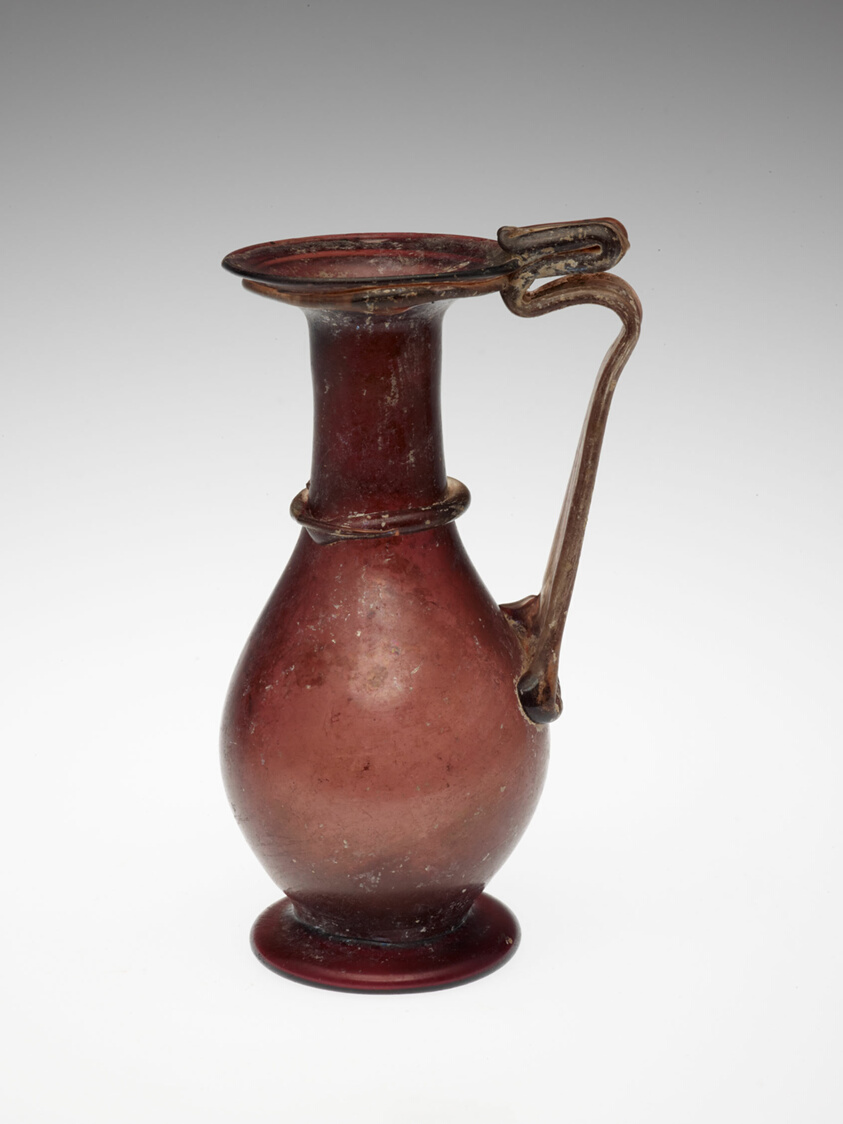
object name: Vessel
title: Jug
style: syrian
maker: Late Roman or Byzantine; Eastern Mediterranean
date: 4th century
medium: Glass, blown technique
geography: Syria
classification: vessel; glass; ancient art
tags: jug, bottles